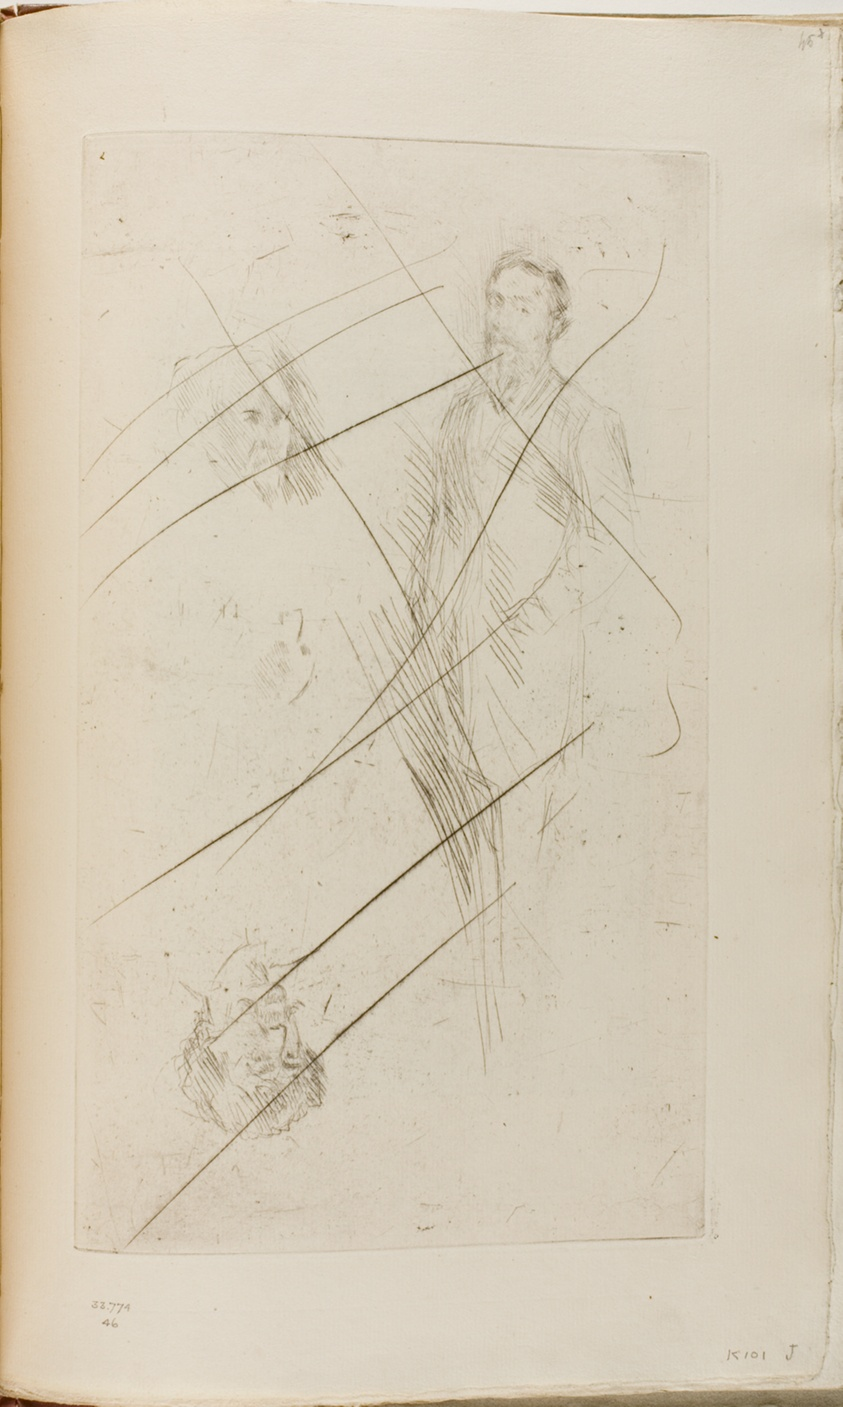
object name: Print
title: Portrait Sketches including F.R. Leyland and Whistler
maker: James McNeill Whistler (American, 1834-1903)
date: 1874/75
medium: Drypoint with foul biting, with drypoint cancellation, in black ink on ivory laid paper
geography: United States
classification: drypoint; prints and drawing; book; foul biting; print; paper